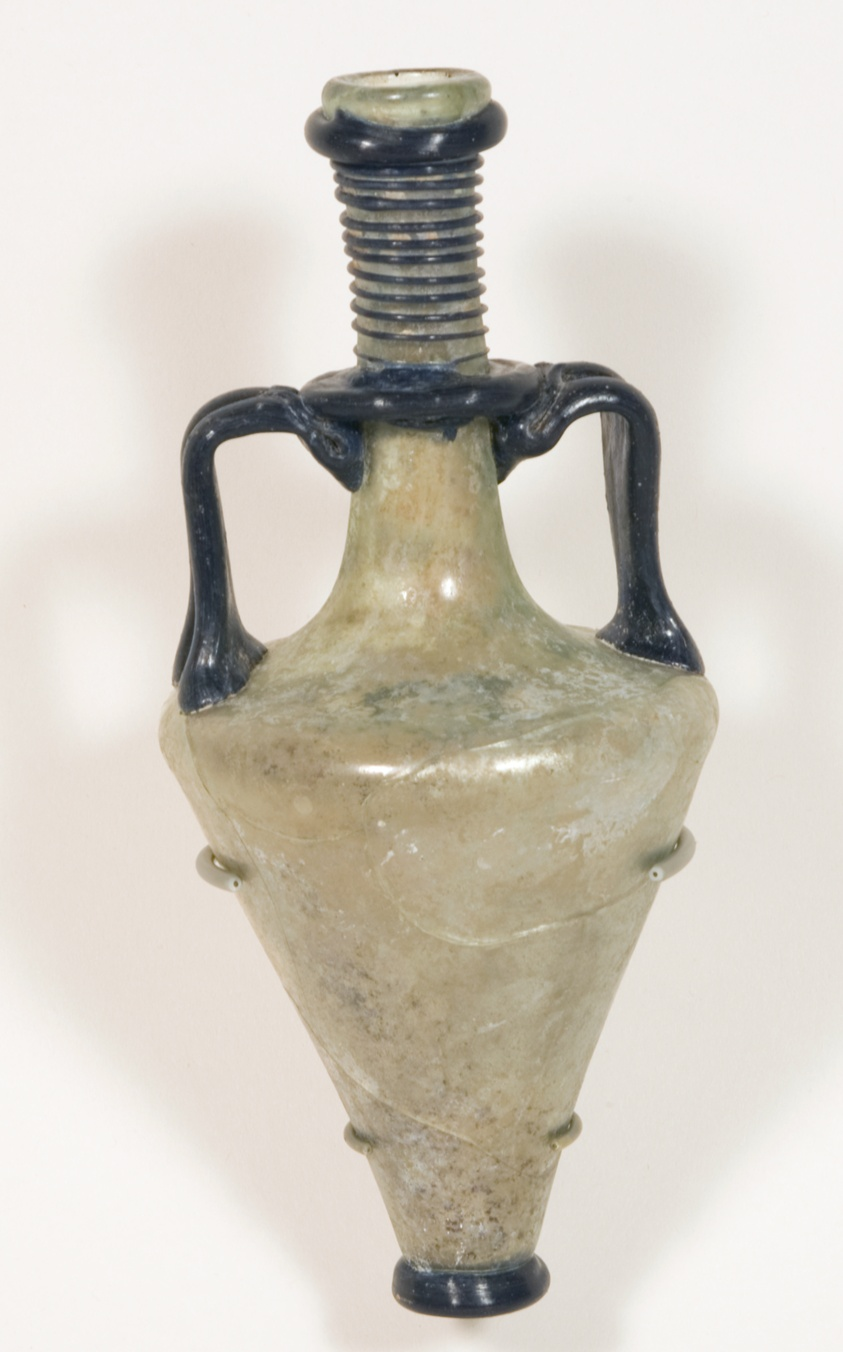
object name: Vessel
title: Double-Handled Flask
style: palestinian, syrian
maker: Roman, probably Palestine or Syria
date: 4th century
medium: Glass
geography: Levant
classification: vessel; glass; ancient art